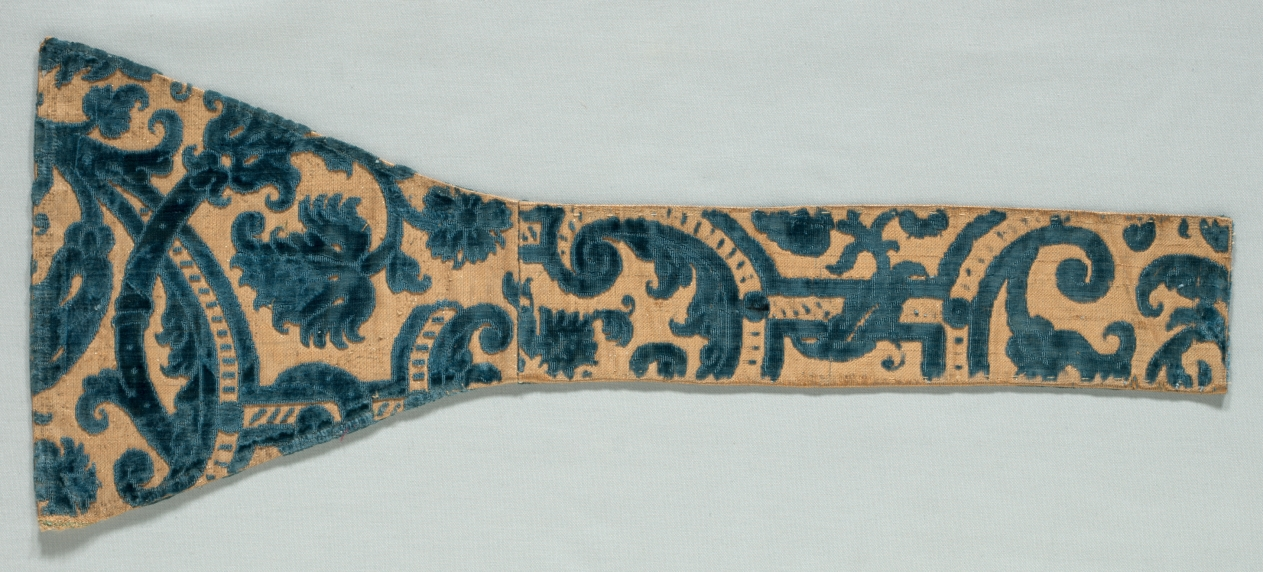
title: Velvet Fragment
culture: Italy, 2nd half of 17th century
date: 1650–1699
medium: velvet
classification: Velvet